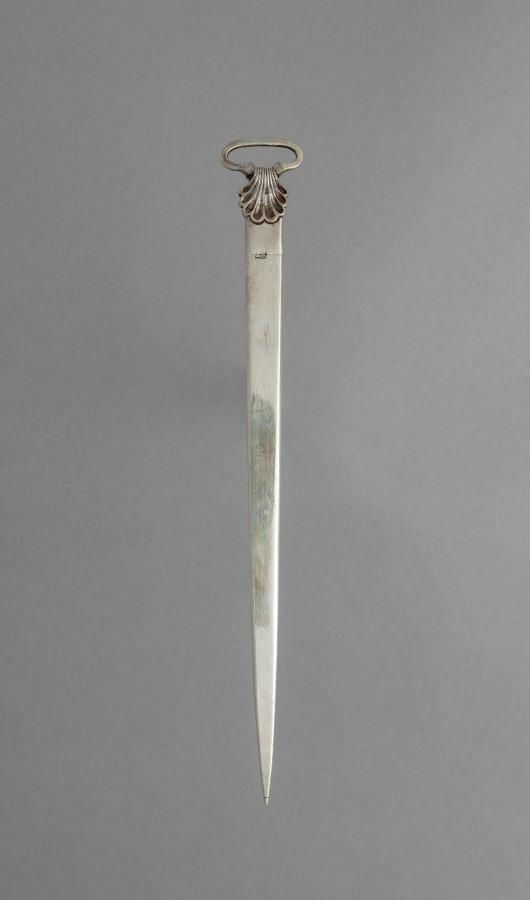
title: Skewer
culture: England, 18th century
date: 1700s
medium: silver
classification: Silver